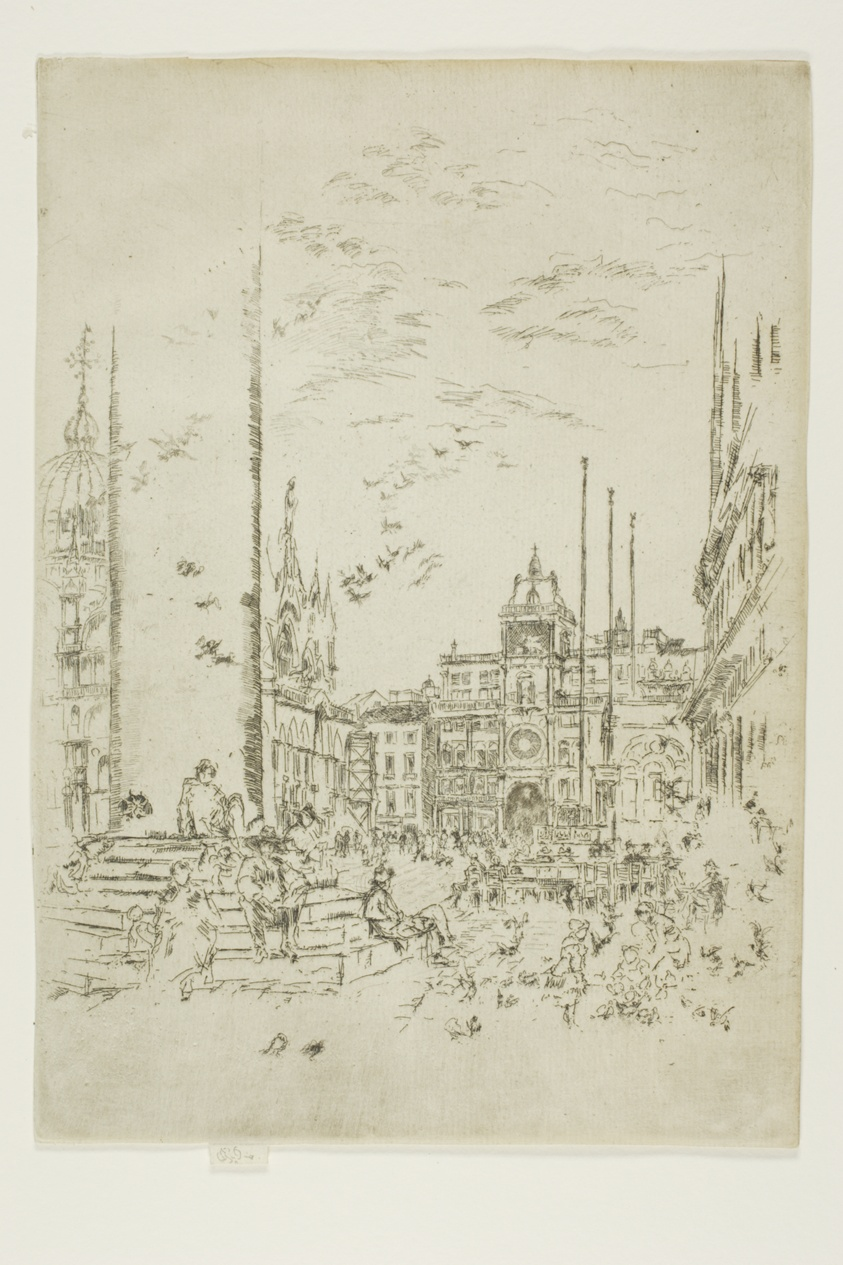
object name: Print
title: The Piazzetta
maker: James McNeill Whistler (American, 1834-1903)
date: 1879/80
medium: Etching and drypoint with foul biting in black ink on cream laid paper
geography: United States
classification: etching; foul biting; print; prints and drawing; paper; drypoint